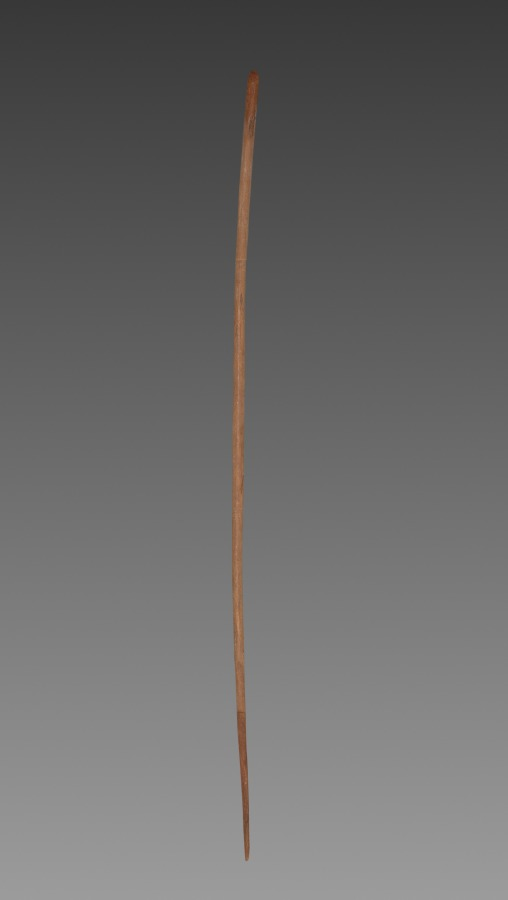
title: Wooden Arrow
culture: Egypt, First Intermediate period (2123–2040 BCE)–Middle Kingdom (2040–1648 BCE)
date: 2123–1814 BCE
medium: wood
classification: Arms and Armor